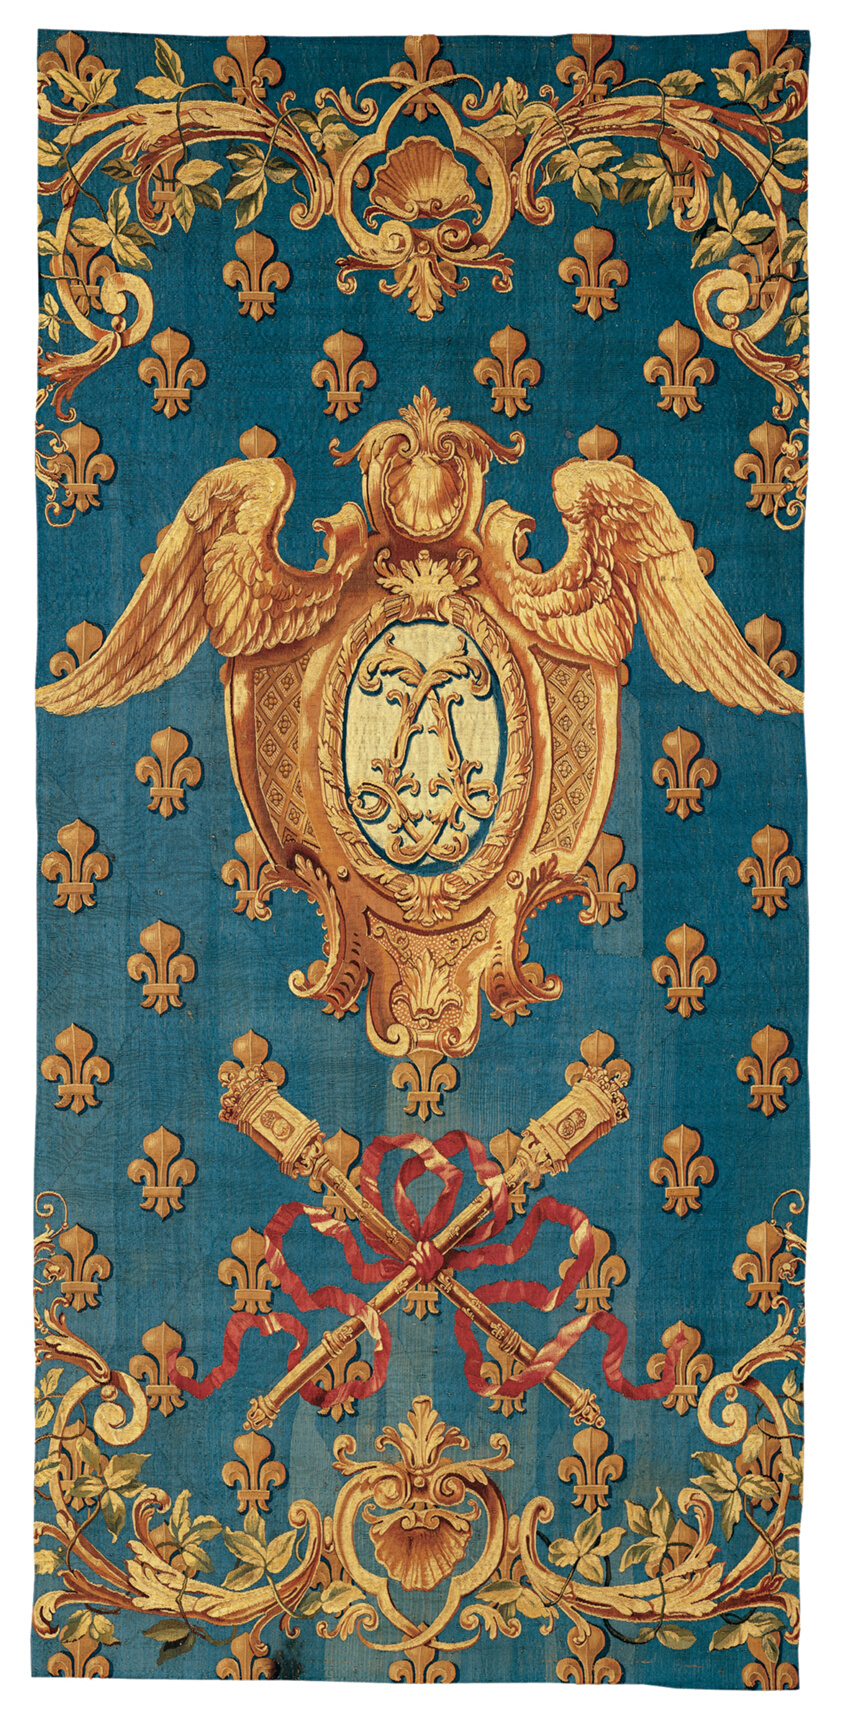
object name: Textile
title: Chancellerie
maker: Woven at an unknown workshop at the Manufacture Royale des Gobelins; France, presumably Paris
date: 1718-21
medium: Wool and silk, slit and double interlocking tapestry weave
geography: France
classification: weaving - tapestry; textile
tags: Monograms, king, coat of arms, cartouches, fleur de lis, ribbon